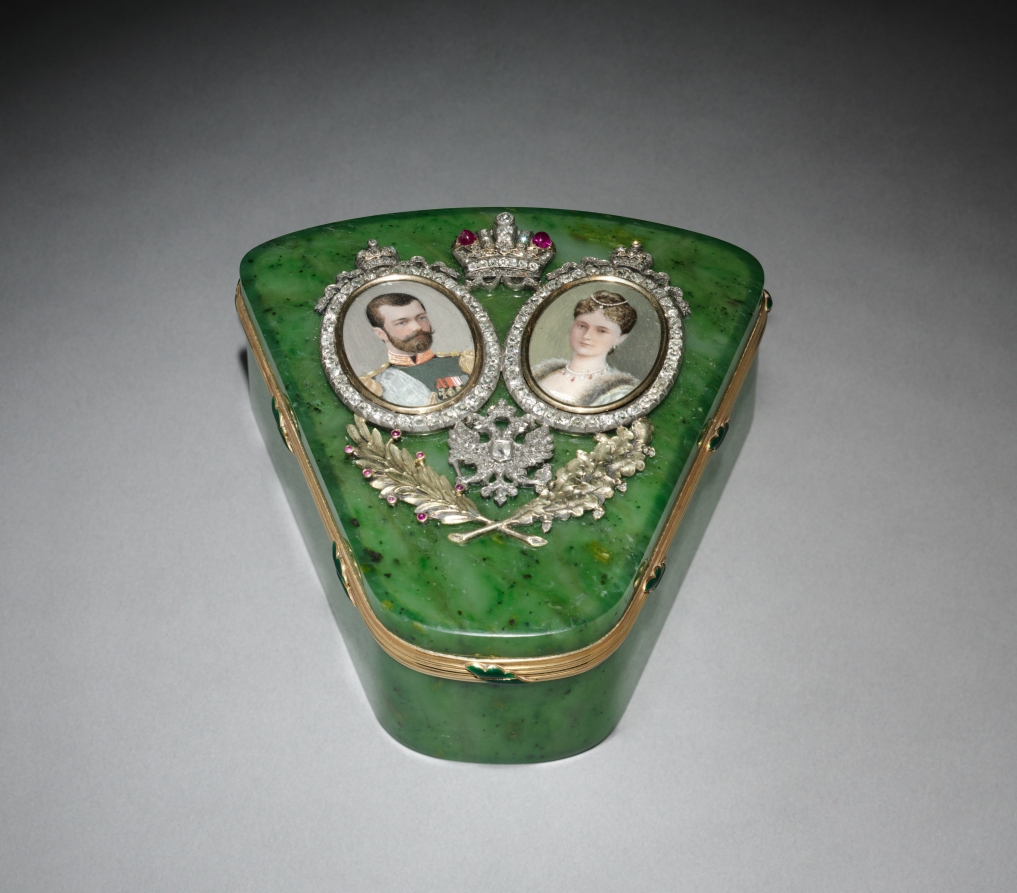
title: Quasi-Triangular Box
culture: Russia, St. Petersburg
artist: firm of Karl Karlovitch Hahn (Russian)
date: c. 1895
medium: jade, gold, enamel, diamonds, rubies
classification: Miscellaneous